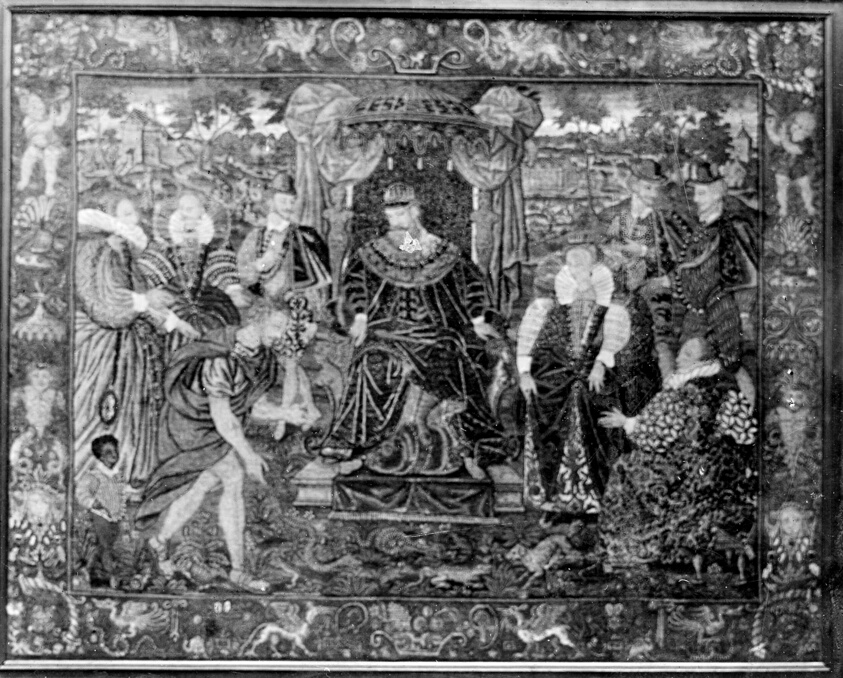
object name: Textile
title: Picture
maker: England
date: 1575/1600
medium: Silk and wool; embroidered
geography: England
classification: textile; needlework (visual works)